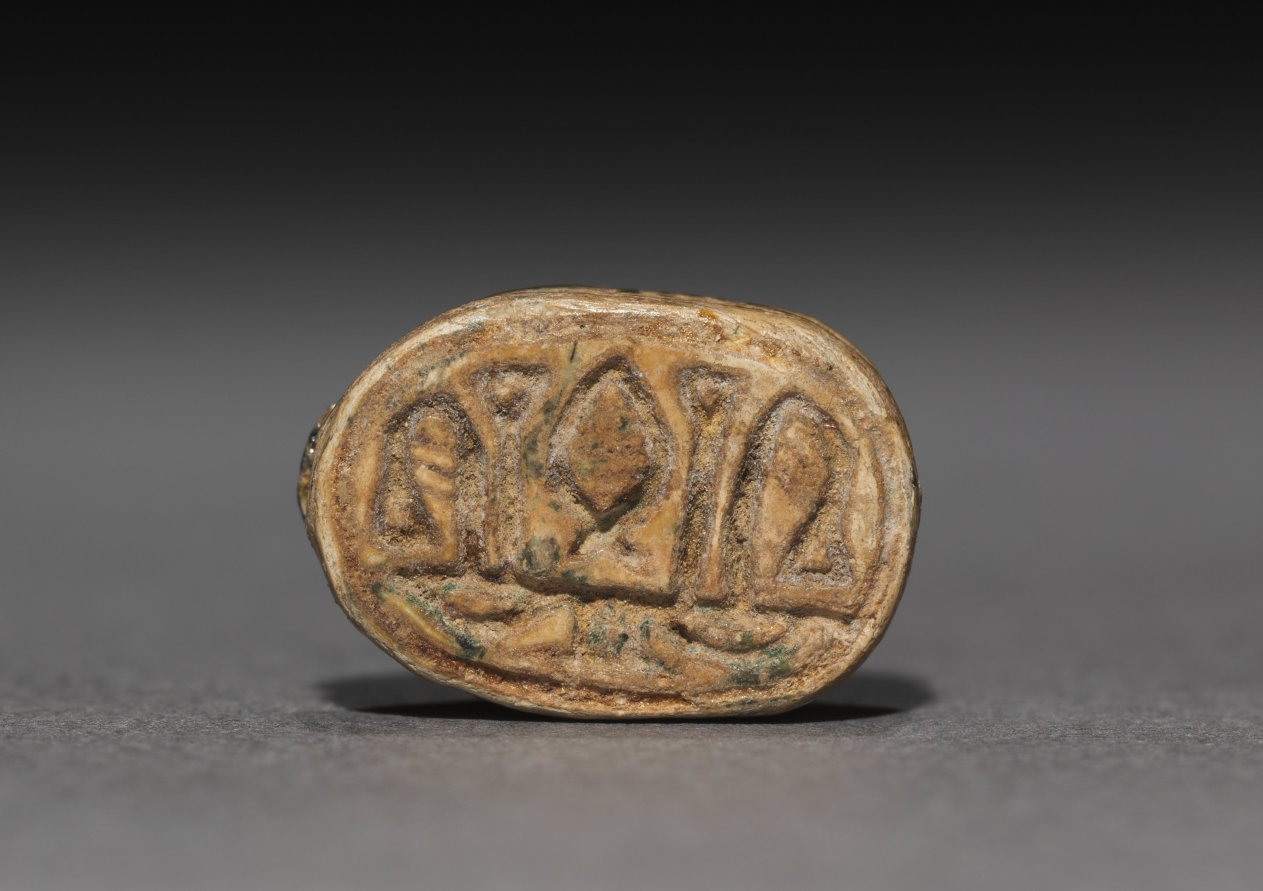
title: Scarab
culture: Egypt, Second Intermediate period (1648–1540 BCE)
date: 1648–1540 BCE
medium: turquoise-glazed steatite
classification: Scarabs